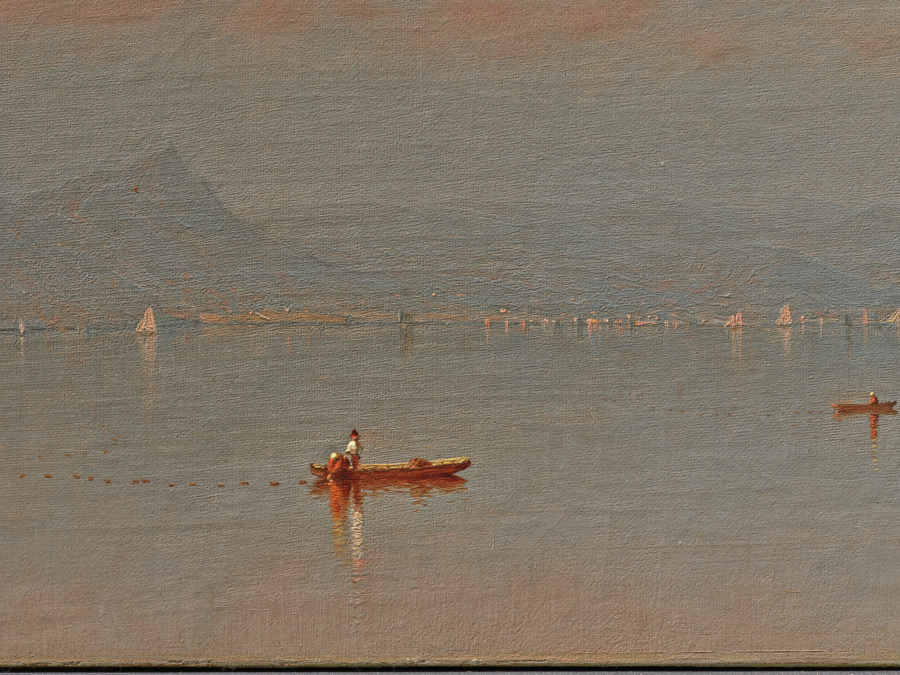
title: Haverstraw Bay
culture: America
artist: Sanford Robinson Gifford (American, 1823–1880)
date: 1868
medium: oil on canvas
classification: Painting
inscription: Signed lower left: S.R. Gifford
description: Located about 40 miles north of New York City, Haverstraw Bay is the widest point on the Hudson River. During the 1860s, it was a prime area for shad fishing, and Gifford’s painting records this activity taking place amid a delicately luminous morning haze.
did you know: Commercial and recreational fishing for now endangered American shad is currently prohibited on the Hudson River.